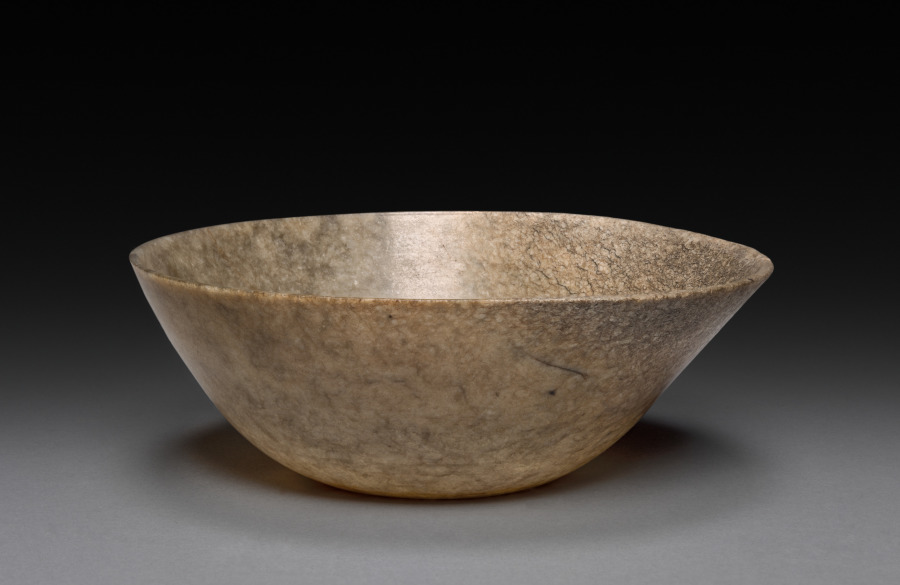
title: Libation Cup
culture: China, Song dynasty (960-1279) or later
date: 960–1279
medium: jade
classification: Jade